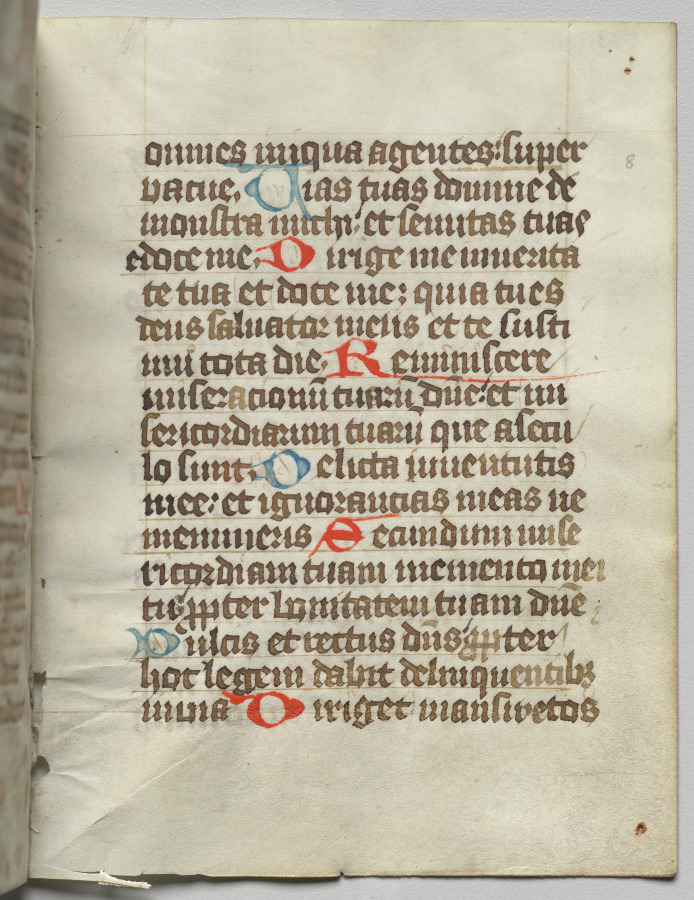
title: Bifolio from a Book of Hours: Text (verso)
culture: Austria (? ) or Bohemia (?), 15th century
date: c. 1460–1500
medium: ink, tempera and gold on vellum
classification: Manuscript